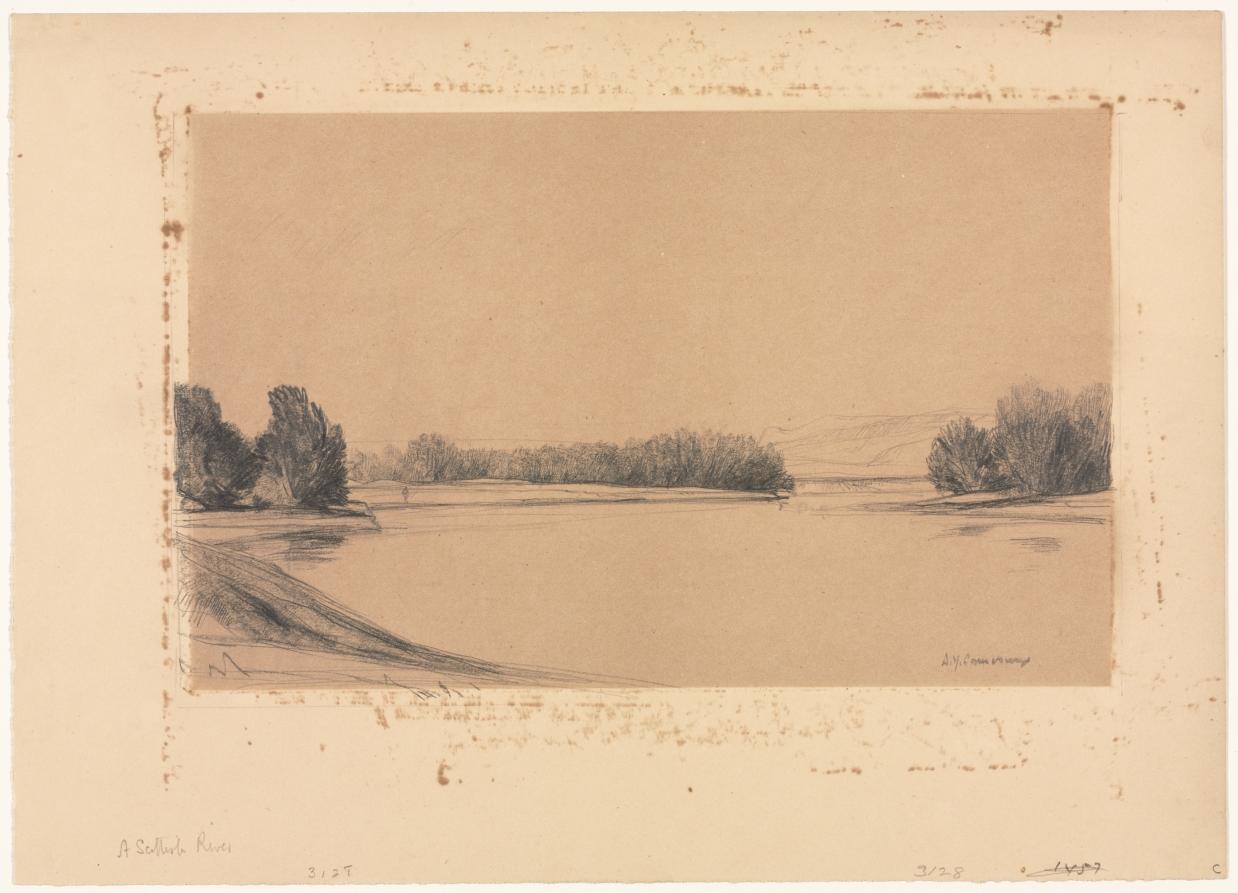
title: A Scottish River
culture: England, 19th-20th century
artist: David Young Cameron (British, 1865–1945)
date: c. 1875–1940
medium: graphite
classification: Drawing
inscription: In graphite, lower right: "D.Y. Cameron"